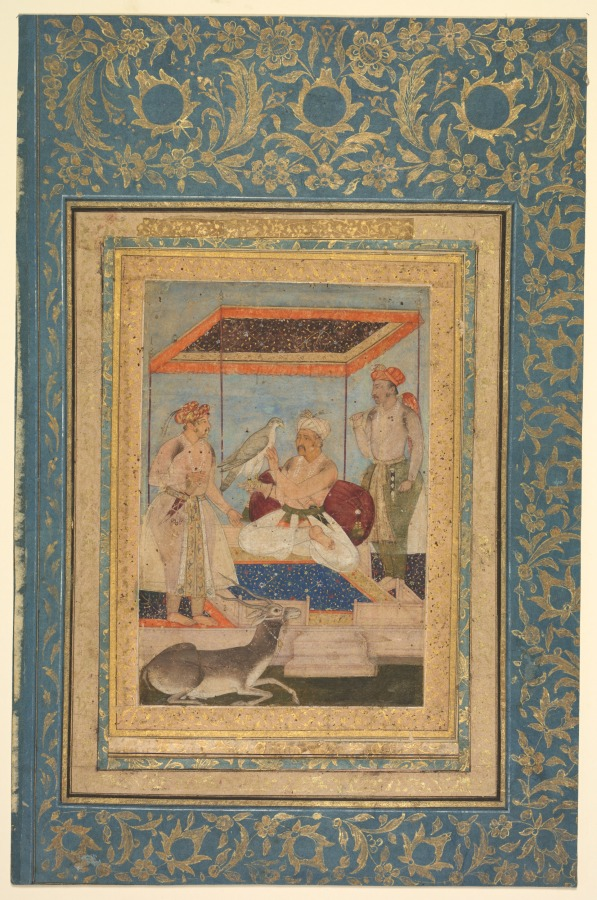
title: Akbar and Jahangir Examine a Ghir Falcon while Prince Khusrau Stands Behind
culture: Mughal India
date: c. 1602–4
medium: gum tempera and gold on paper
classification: Painting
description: Emperor Akbar sits against a purple bolster under a canopy looking aged and careworn, probably not long before his death. He examines a trained falcon of the type that the Mughals used in hunting. This falcon appears to be from Akbar’s son, Prince Salim, who stands before him in a gesture of gift-giving. A stately black antelope, a wild animal now a pet, harnessed and wearing a bell, crouches at the foot of the steps leading up to the canopied platform.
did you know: Salim rests his hand on a sharply pointed dagger in a red velvet sheath.